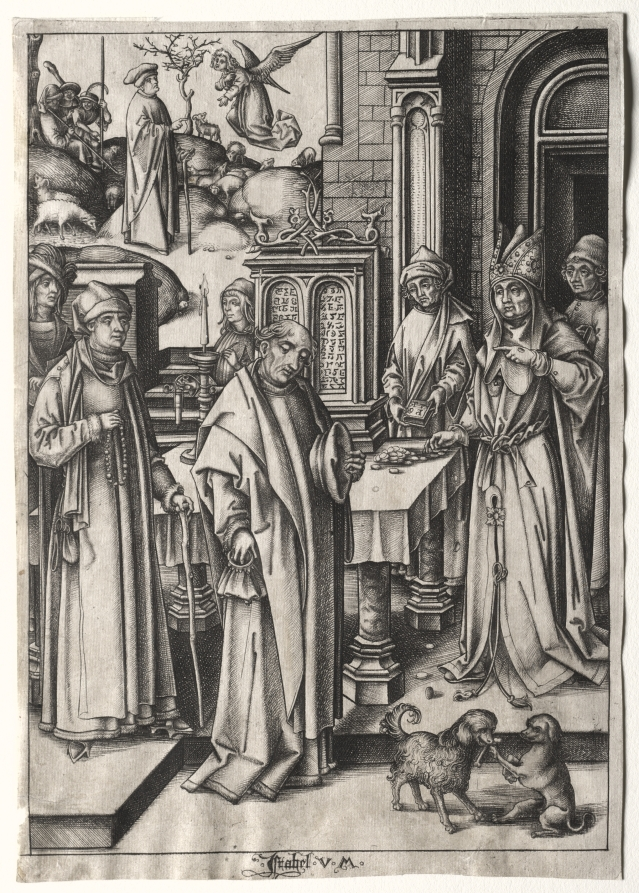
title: Life of the Virgin: High Priest Rejecting the Offering of Joachim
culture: Germany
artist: Israhel van Meckenem (German, c. 1440–1503)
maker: after Hans Holbein (German, c. 1465–1524)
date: c. 1493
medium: engraving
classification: Print